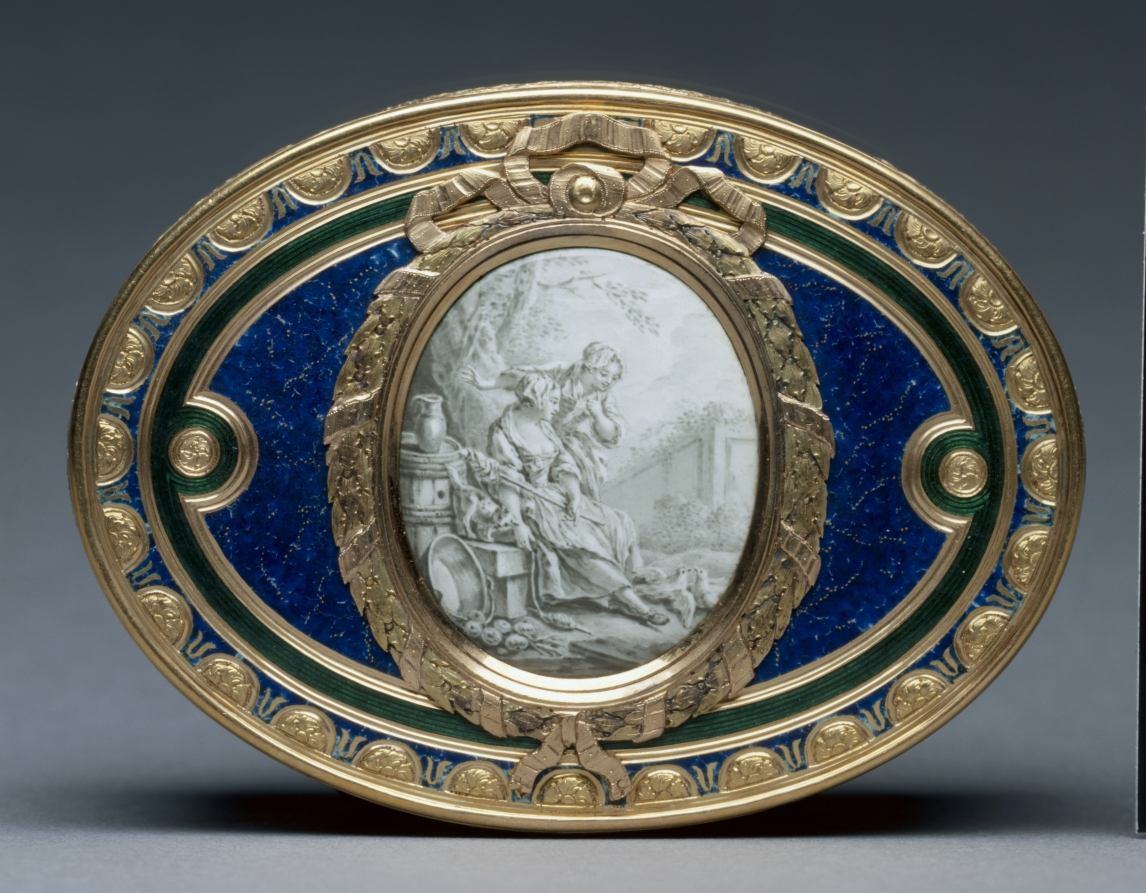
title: Snuff Box (Tabatière) with Portrait of Marie Antoinette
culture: France, 18th century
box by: Pierre-François-Mathis de Beaulieu (French)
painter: François Dumont (French, 1751–1831)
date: 1768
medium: watercolor on ivory in a gold and enamel box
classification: Enamel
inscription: [Maker's mark of Pierre-François-Mathis de Beaulieu, master goldsmith in 1768, inside cover]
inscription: [Charge mark of Jean-Jacques Prévot, 1762-1768, inside cover]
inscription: [Warden's mark of Paris, 1768-1769, inside cover]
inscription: [Discharge mark of Julien Alaterre, Paris, 1768-1774, on neck at right]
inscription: [Inside box, the letter]: "F"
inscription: [On bezel at left, engraved number]: "627"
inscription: [On front of bezel, engraved signature]: "Ve Georges Beaulieu à Paris"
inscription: [On right of miniature portrait, the letter]: "D"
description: This box was created through the collaboration of two skilled and well-known artisans of the period, master goldsmith Pierre-François-Mathis de Beaulieu and celebrated miniature painter François Dumont. The portrait of Marie Antoinette on the box's lid is painted in Dumont’s own style while those on the sides and bottom of the box take inspiration from the work of painter François Boucher, known for his pastoral scenes in the Rococo style.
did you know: Marie Antoinette, queen consort of French King Louis XVI and great patron of the decorative arts, was executed in 1793 at the end of the French Revolution.